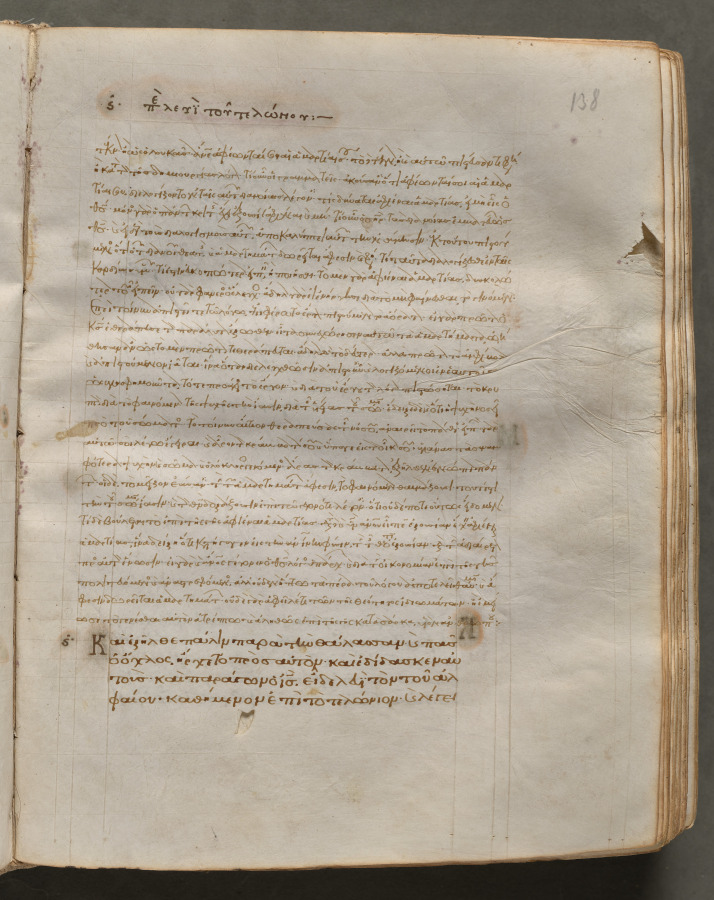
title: Text, folio 138 (recto), from a Gospel Book with Commentaries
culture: Byzantium, Constantinople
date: c. 1000–1100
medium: ink, tempera, and gold on vellum; leather binding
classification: Bound Volume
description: Each of the four gospels in this book opens on a page with brilliantly illuminated borders depicting the author of the text as well as birds-principally peacocks, symbols of the immortality of the soul-and fountains, representing the fountain of life and the salvation of the soul. This volume consists of 428 leaves with texts in Greek. Its level of sophistication suggests that it was probably written and decorated in a monastery in Constantinople.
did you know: Gospel Books were carried in procession through Byzantine churches.